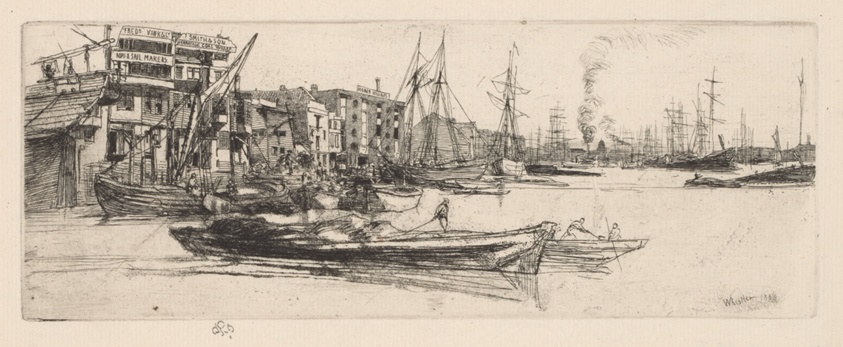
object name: Print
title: Thames Warehouses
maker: James McNeill Whistler (American, 1834-1903)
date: 1859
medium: Etching and drypoint with foul biting in black ink on ivory laid paper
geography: United States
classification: etching; foul biting; print; prints and drawing; paper; drypoint